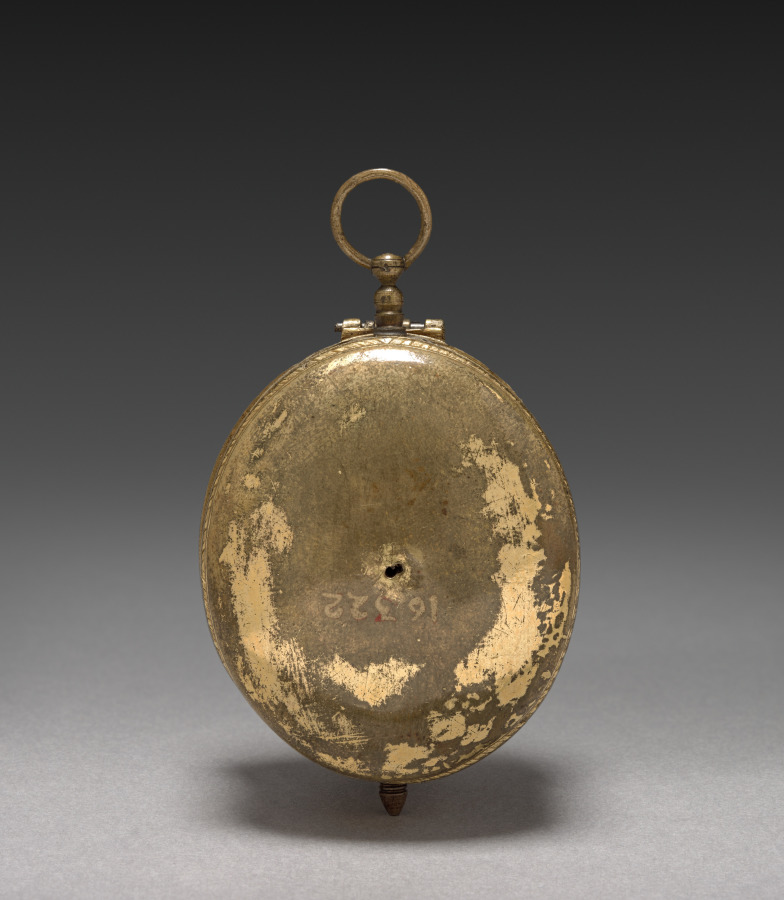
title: Watch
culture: Germany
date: 1600s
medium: gilded metal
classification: Jewelry